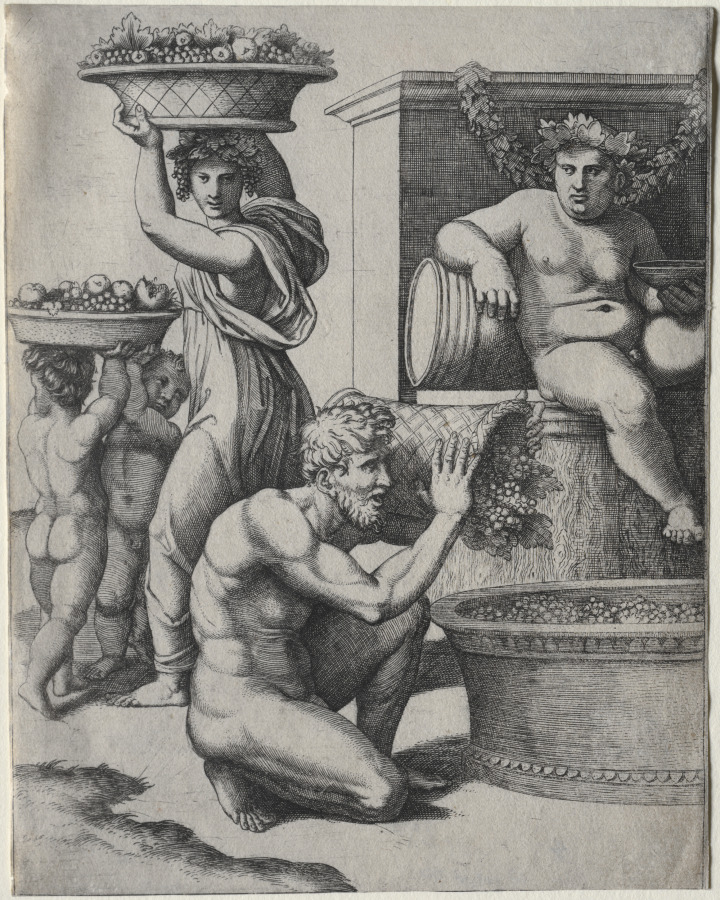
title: The Wine Press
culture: Italy, 16th century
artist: Marcantonio Raimondi (Italian, 1470/82–1527/34)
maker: after Raphael (Italian, 1483–1520)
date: c. 1517–20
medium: engraving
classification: Print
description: Here, Silenus sits thoughtfully on a throne, wine cup in hand, accompanied by harvesters who carry and transfer grapes. The composition was invented by renowned painter Raphael, with whom engraver Marcantonio Raimondi had a long-standing collaborative relationship. The powerful poses of Silenus, the crouching man, and the statuesque woman can be traced to relief-carved Roman sarcophagi (stone coffins) probably known to Raphael. The print may record part of a now-lost painted bacchanalia image made by Raphael for the Duke of Ferrara’s palace in Italy. Bacchic subject matter showed the duke to be a cultured man who also gave a good party.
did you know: Silenus, Bacchus's tutor, portrayed here watching the grape harvest with his wine cup, was known for his ability to drink wine straight from the barrel without mixing it with water (which was how mere mortals enjoyed the drink).